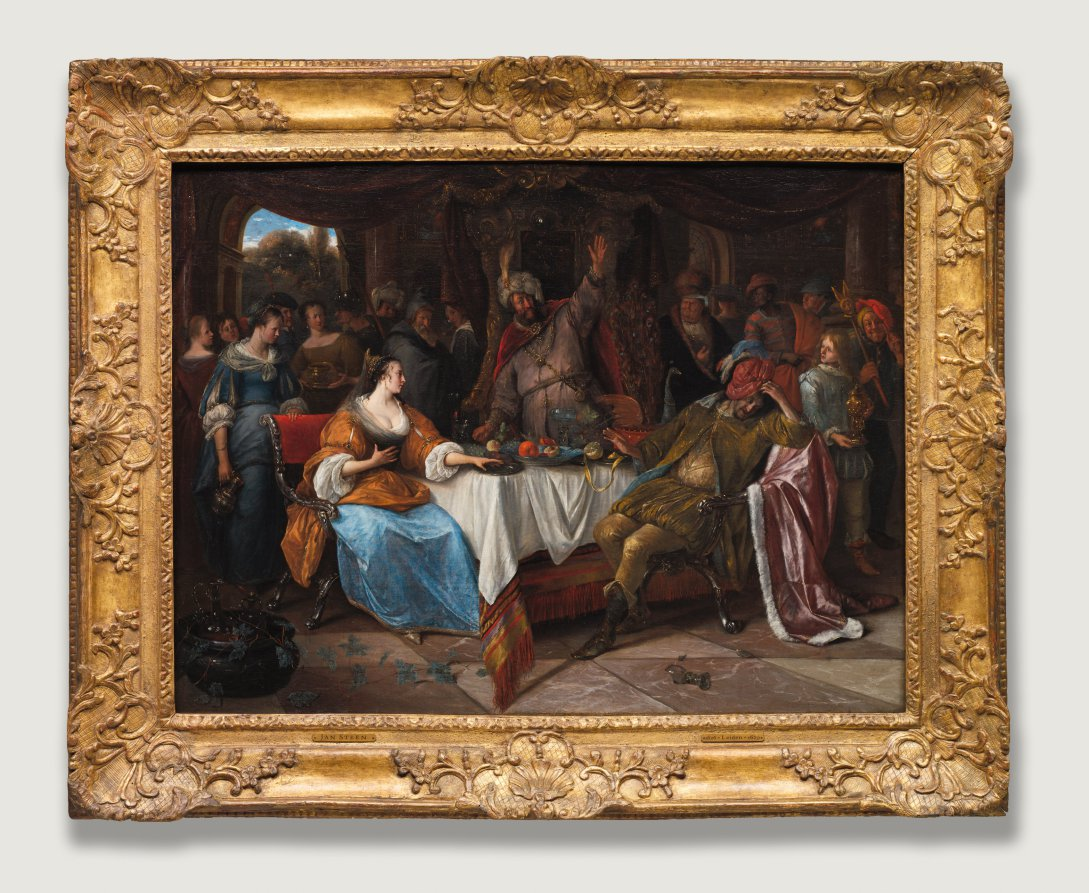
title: Esther, Ahasuerus, and Haman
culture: Netherlands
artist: Jan Steen (Dutch, 1626–1679)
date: c. 1668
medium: oil on canvas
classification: Painting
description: Esther, the wife of the Persian king Ahasuerus, effectively concealed her Jewish identity until the prime minister Haman hatched a plot to annihilate the kingdom’s Jews. To save her people Esther persuades the king (at the center) to rescind his order. He then turns against Haman, who slumps in his seat, aware of his sudden fall from power and his bleak future.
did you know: At the center of this biblical scene, Steen included elements of a typical Dutch still life: a Roemer glass, a half-peeled lemon, and a blue-and-white porcelain dish.